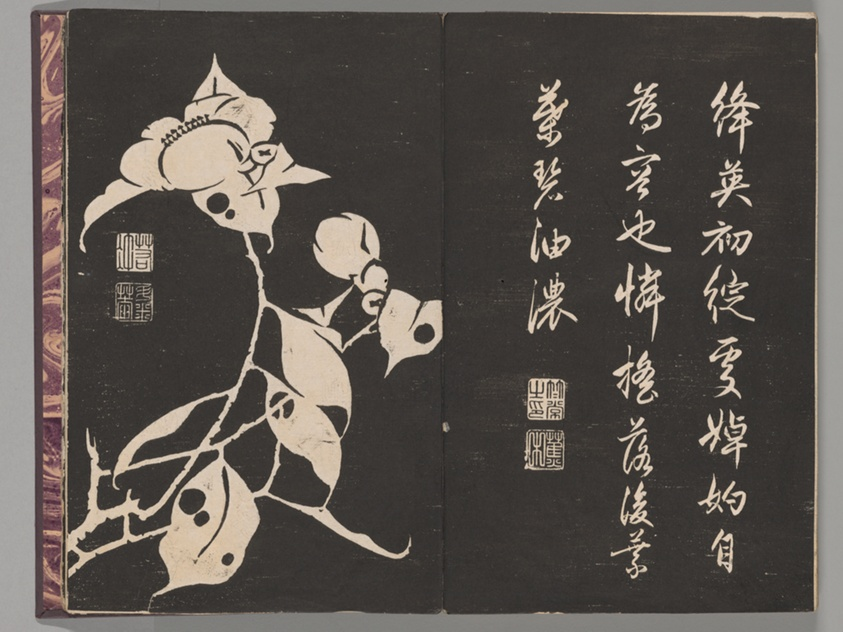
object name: Book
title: Soken sekisatsu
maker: Ito Jakuchu (Japanese, 1716-1800)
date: 1767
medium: Woodblock printed book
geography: Japan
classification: book